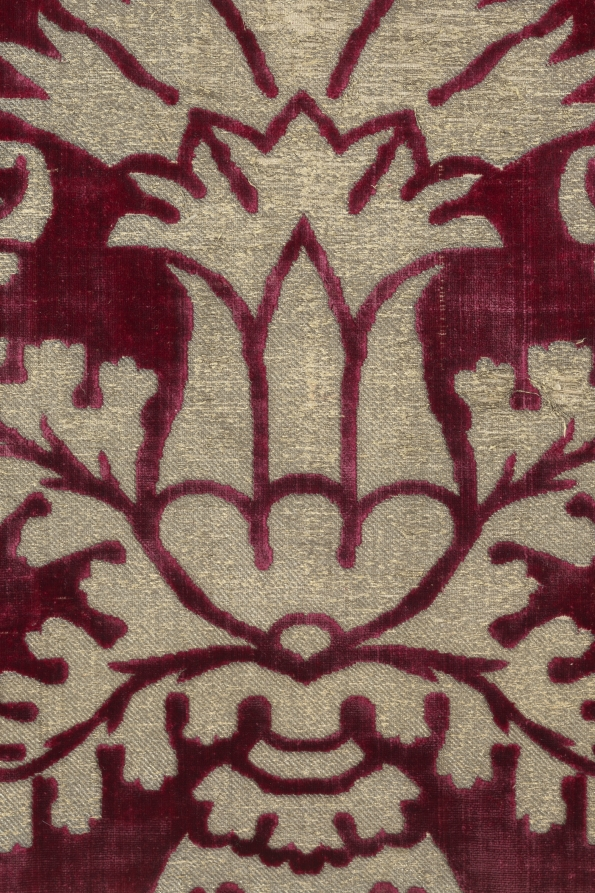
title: Brocaded Velvet Panel with Italianate Pattern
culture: Turkey, Istanbul or Bursa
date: 1575–1625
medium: Silk: velvet, brocaded; gilt-metal thread and cotton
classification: Velvet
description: Rarely are four fabric widths preserved together from any culture. This gilt-metal thread pattern combines Turkish and Italian features: the large ogival (curved) lattice clasped by crowns and the velvet structure are Turkish, and the two so-called artichoke designs are enlarged adaptations of Italian motifs. A symbol of wealth and power, this velvet panel was woven during the artistic height of the Ottoman Empire in the late 1500s. It may have covered a divan (sofa) or possibly enhanced a wall during cold winters in the imperial Topkapi Palace in Istanbul.